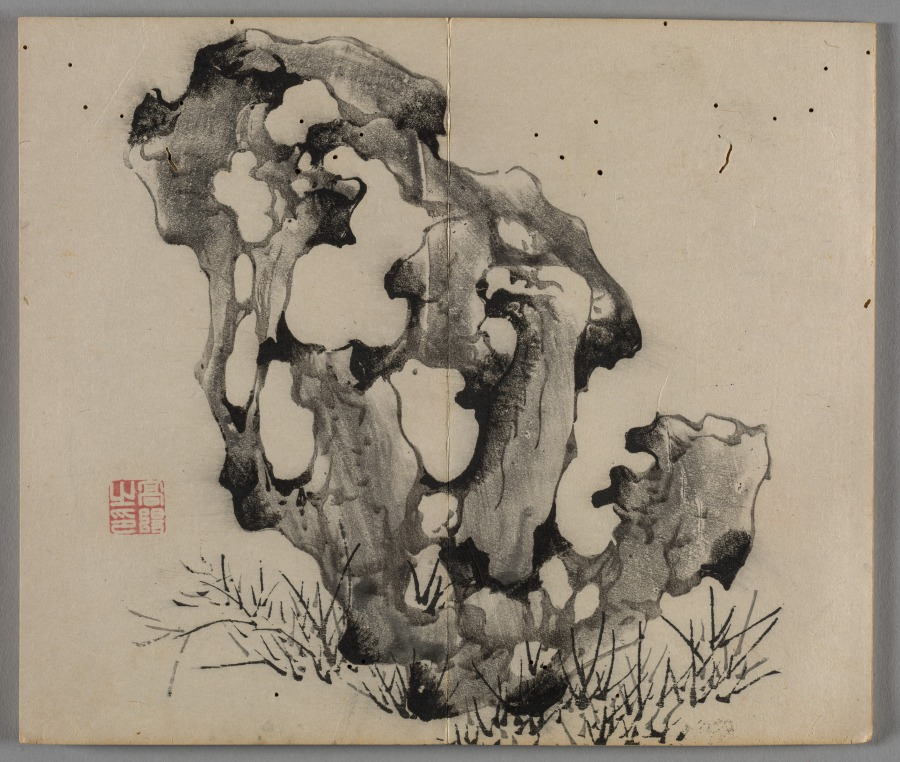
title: Ten Bamboo Studio Painting and Calligraphy Handbook (Shizhuzhai shuhua pu): Rocks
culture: China, Qing dynasty (1644-1911)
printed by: Hu Zhengyan (Chinese, c. 1584–1674)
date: 1633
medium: Woodblock-printed book; ink and colors on paper; first edition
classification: Print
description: Color printing reached a level of perfection in the early 1600s, as seen in this Ten Bamboo Studio Collection of Calligraphy and Painting and the Mustard Seed Garden Manual of Painting (printed 1679 and 1701). The painterly quality, precision in registering (aligning) the woodblocks, and harmonious colors made them the most successful color print editions in Chinese history. Both editions were printed and compiled in Nanjing, spread nationwide, and had a great impact on the arts in Japan and Korea.